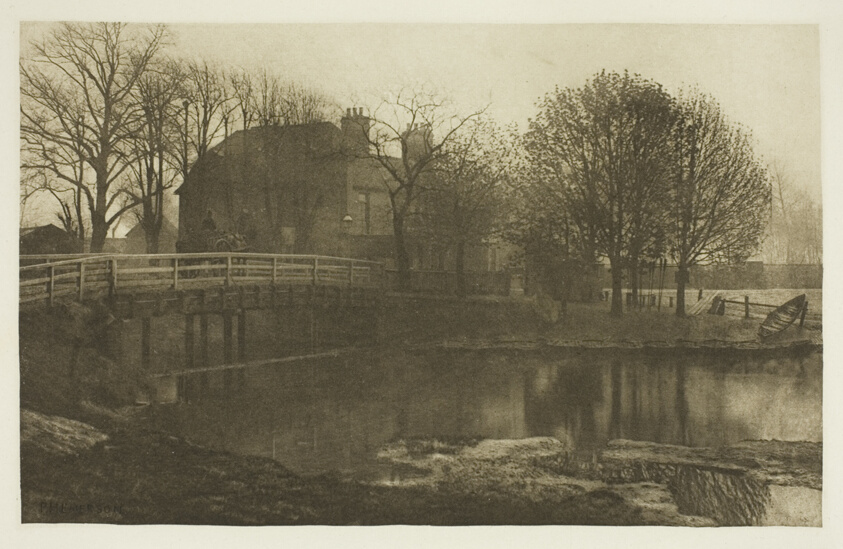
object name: Photograph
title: The Ferry Boat Inn, Tottenham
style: 19th century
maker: Peter Henry Emerson (English, born Cuba, 1856–1936)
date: 1880s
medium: Photogravure, plate XXVIII from the album "The Compleat Angler or the Contemplative Man's Recreation, Volume II" (1888)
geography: England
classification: photogravure; photomechanical process; photography; photograph